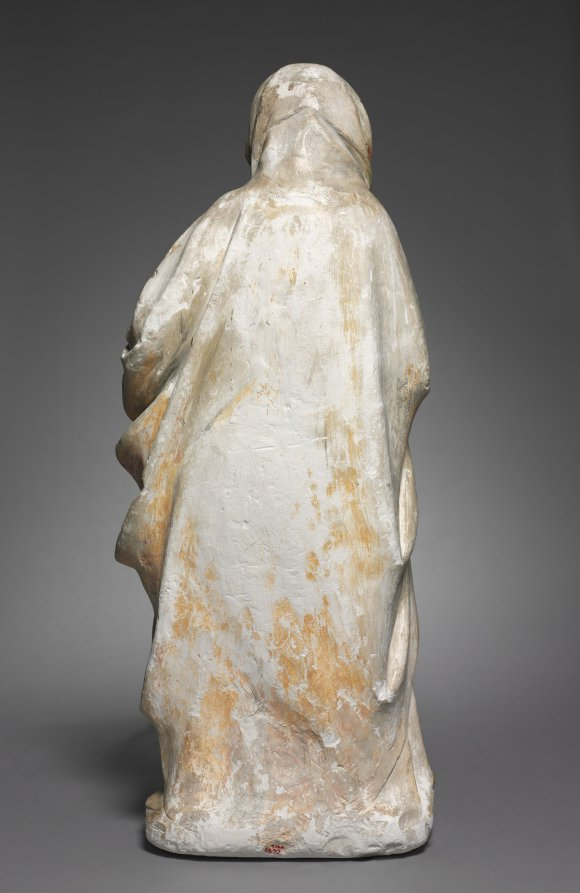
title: Standing Virgin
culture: Netherlands, active Dijon, 15th century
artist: follower of Claus de Werve (Netherlandish, 1380–1439)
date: c. 1440–1450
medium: painted and gilded limestone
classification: Sculpture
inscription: inscriptions on reverse.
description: This standing Virgin now lacks the child she once cradled in her left arm. The sculpture may have been damaged in the French Revolution by falling onto its face. It was carved from soft white limestone of a type known to be quarried at Asnières-lès-Dijon, near Champmol. The figure recalls many of the hallmarks of the style of Claus de Werve, a Netherlandish artist active at the court of Burgundy. The Virgin has a sweet, round face that is also smooth and fleshy, her eyelids droop pensively and she is engulfed in rich voluminous draperies that cascade in deep folds. This sculpture should be seen as a charming reflection of de Werve’s many Virgin and Child groups. It was probably carved by a follower closely acquainted with his style.